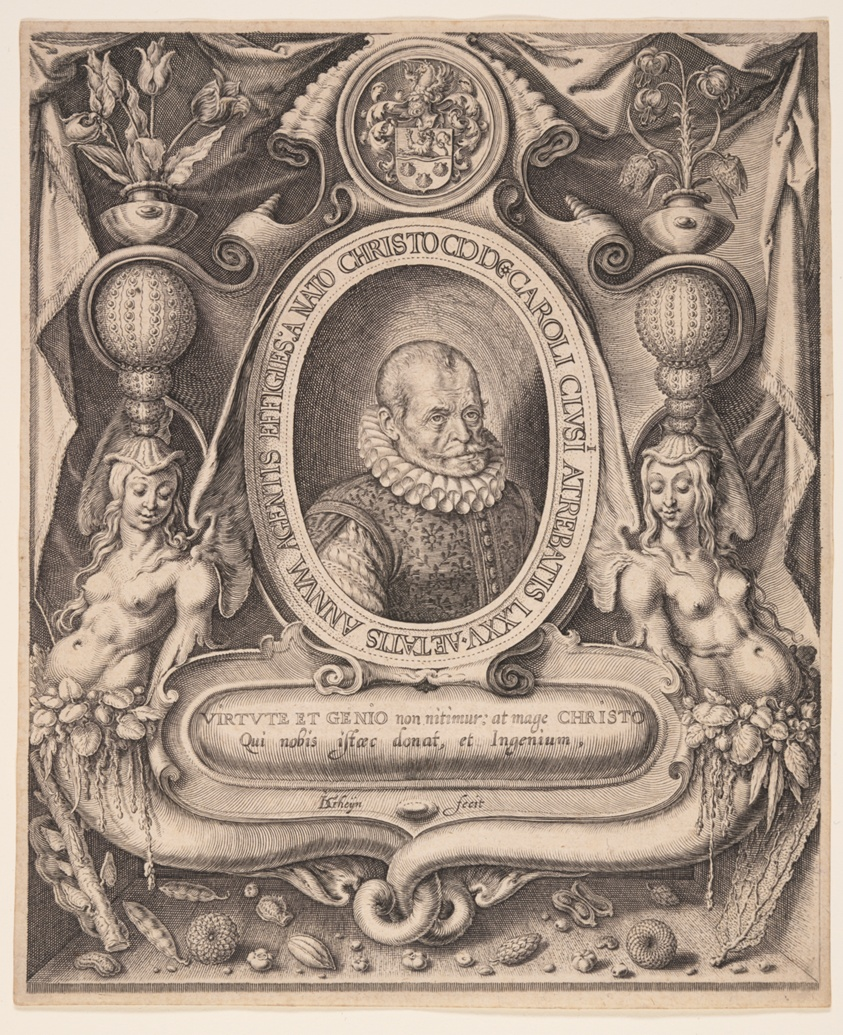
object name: Print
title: Carolus Clusius, Physician and Botanist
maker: Jacques de Gheyn II; Dutch, 1565–1629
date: 1601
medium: Engraving on laid paper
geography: Netherlands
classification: print; engraving; paper; prints and drawing